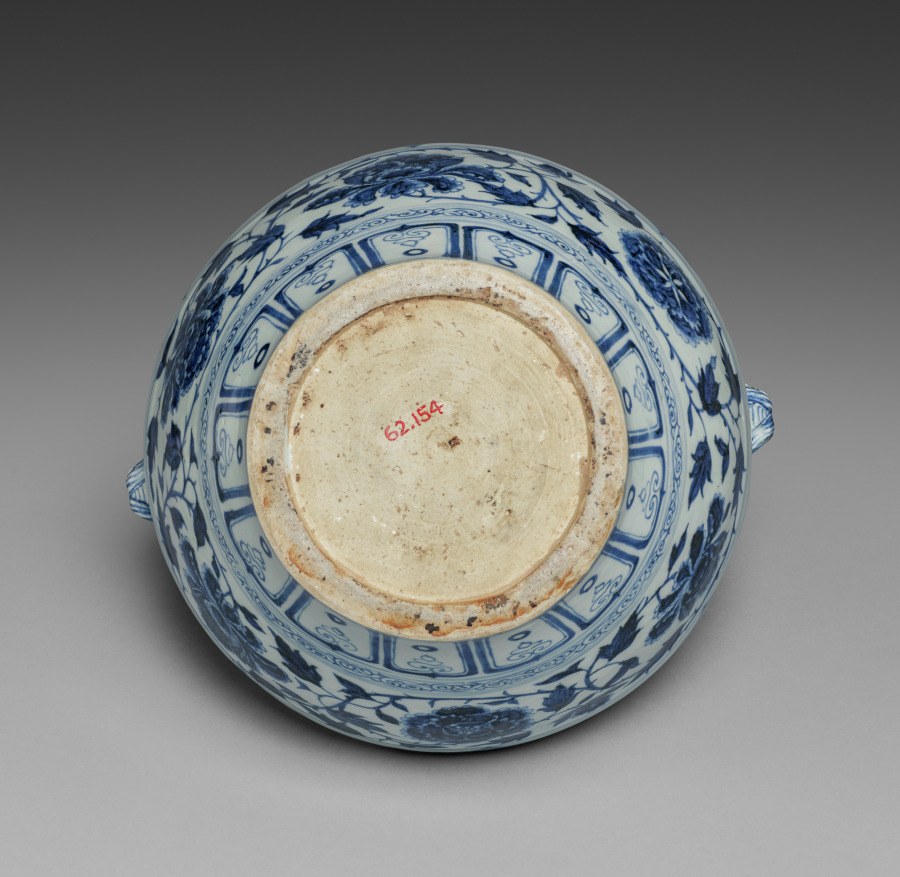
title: Jar with Lion-Head Handles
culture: China, Jiangxi Province, Jingdezhen, Yuan dynasty (1271–1368)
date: 1300s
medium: porcelain with underglaze painted decoration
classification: Ceramic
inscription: 南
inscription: 宮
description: Appreciated for its strong profile, brilliant blue color, and firm delineation of the decorative patterns, this jar is a classic example of Yuan dynasty blue-and-white ware. This type of ware was produced no later than the 1330s for both domestic use (the court and common people alike) and overseas trade. This example testifies to the transmission of artistic ideas and techniques between China and the rest of the great Mongol Empire as a result of trade. The cobalt that was used for the blue underglaze decoration was imported from Iran, likely from Kashan. The band of cloud-collar motifs with phoenixes set against floral grounds, as shown here, is an artistic vocabulary that can also be found in Iranian decorative arts of the Ilkhanid period (1256–1353).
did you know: The characters for "palace" and "south" are scratched into the white glaze on the vessel's shoulder, suggesting that it was once kept in a specific location in a palace.